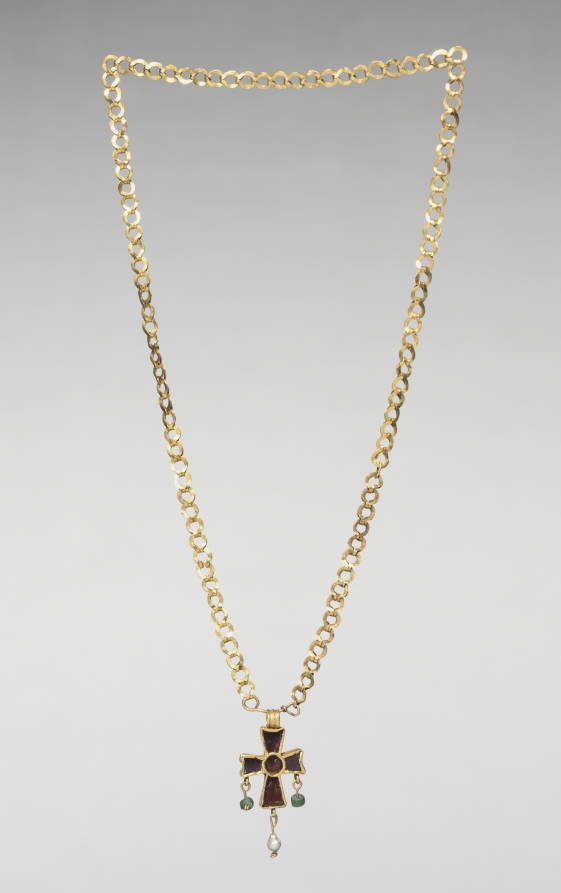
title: Chain with Pendant Cross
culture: Byzantium, early Byzantine period, 6th century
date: 500s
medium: gold, glass, pearl, garnet, and sapphire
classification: Jewelry